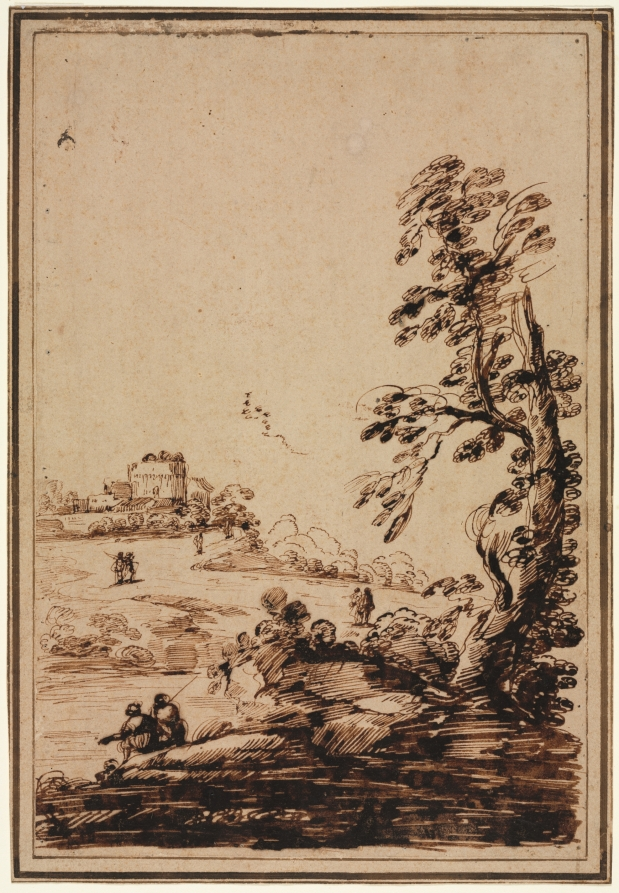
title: Landscape with Small Group of Buildings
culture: Italy, 18th century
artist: imitator of Guercino (Italian, 1591–1666)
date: second half 1700s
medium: pen and brown ink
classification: Drawing